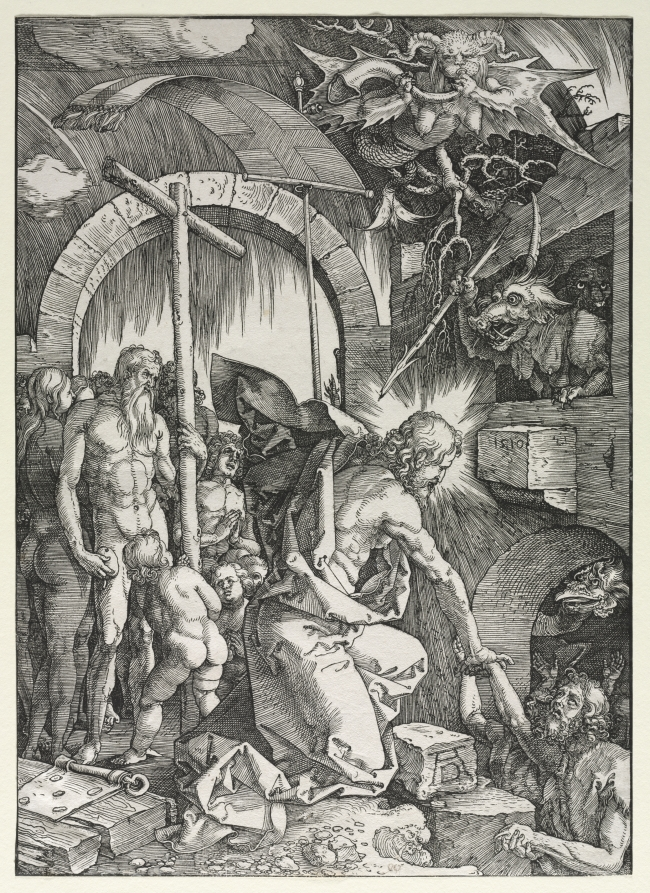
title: The Large Passion: Christ Descending into Limbo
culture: Germany, early 16th Century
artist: Albrecht Dürer (German, 1471–1528)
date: 1510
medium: woodcut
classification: Print